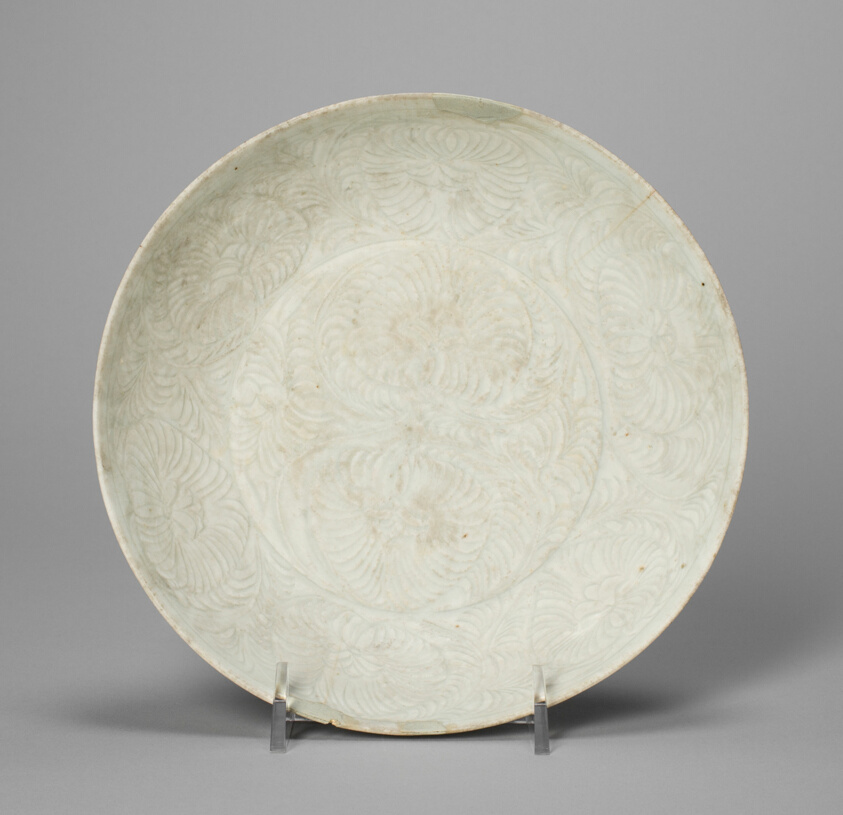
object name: Vessel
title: Dish with Floral Scrolls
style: Chinese (culture or style)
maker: China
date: Song dynasty (960–1279)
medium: Stoneware with underglaze carved and incised decoration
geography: China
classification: dish (vessel); asian art; ceramics; vessel